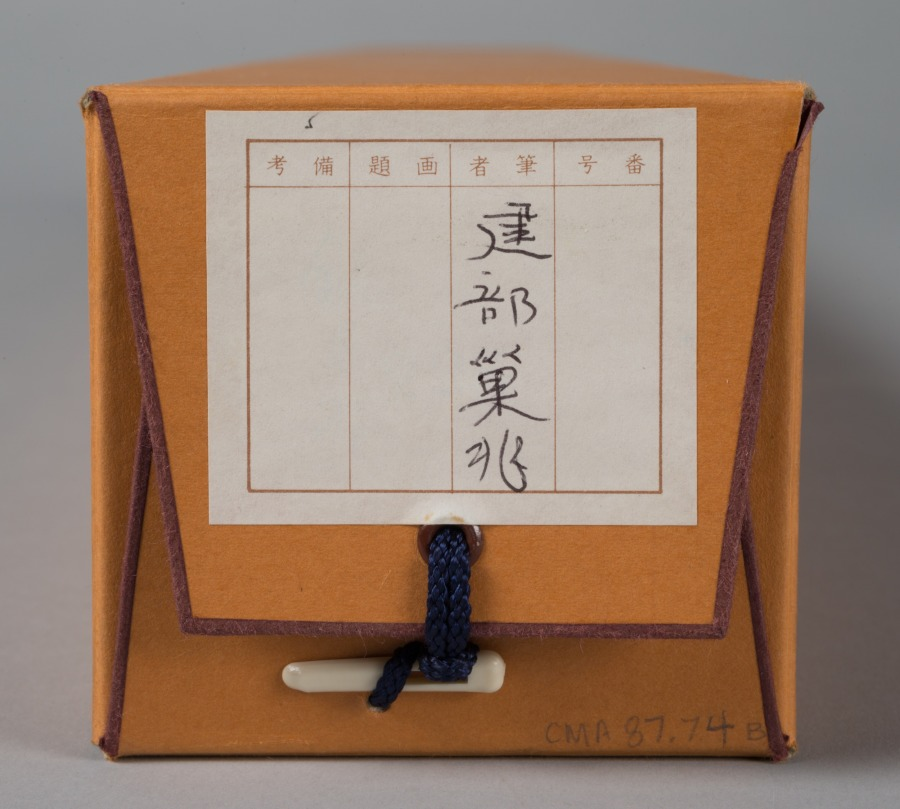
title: Genre Figures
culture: Japan, Edo period (1615–1868)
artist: Takebe Sōchō (Japanese, 1760–1814)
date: c. 1816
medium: hanging scroll; ink and color on paper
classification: Painting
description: Though rarely mentioned in official histories, Socho was an accomplished painter whose talent is readily apparent to the modern eye. For his compositions he chose traditional Japanese stories or everyday events. This painting belongs to a triptych (set of three) that was recently converted from folding screen panels to hanging scrolls.